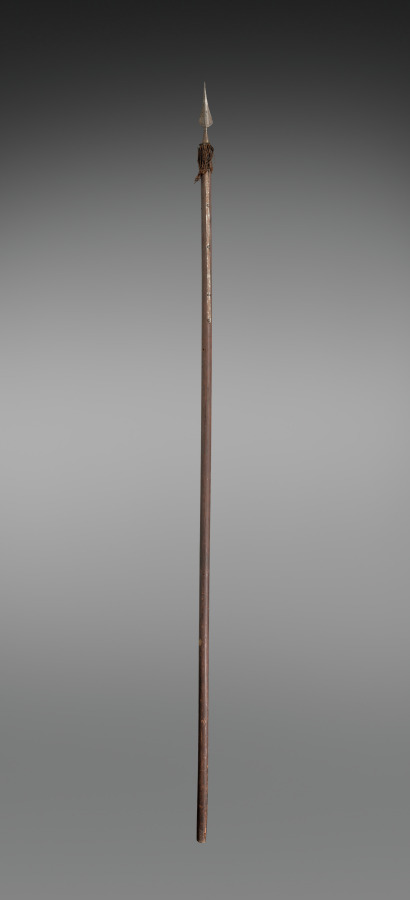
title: Pole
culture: Spain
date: 1700s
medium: wood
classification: Arms and Armor